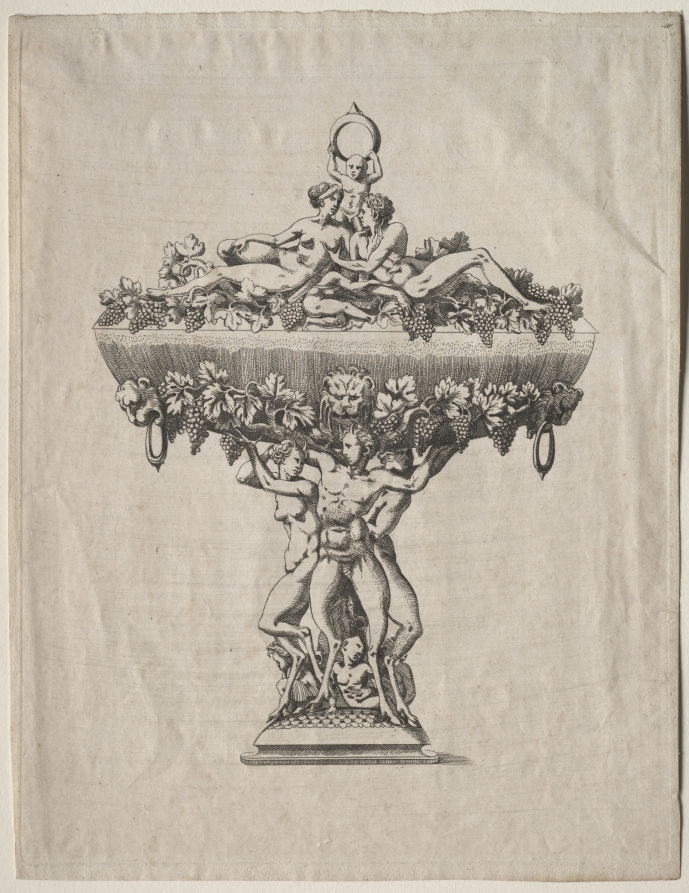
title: Covered Cup with Grape Festoon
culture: France?, 16th century (?)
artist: copy after Antonio Fantuzzi (Italian, c. 1510-c. 1550)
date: mid-1500s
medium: etching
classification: Print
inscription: lower right, in graphite: [sp?]; lower right, in graphite: [illegible]; VERSO, lower left, in graphite: TNK[line above] / L.B. 1447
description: When the French king Francis I (reigned 1515–47) decided to renovate his hunting lodge at Fontainebleau, near Paris, he set the stage for the development of Mannerism in France. In the early 1530s, Francis I successfully lured the Italian artists Rosso Fiorentino (1495–1540) and Francesco Primaticcio (1504/5–1570) to Fontainebleau to participate in its redecoration. The most influential project at Fontainebleau was the long corridor now known as the Gallery of Francis I. Here, Rosso developed an innovative system of wall decoration that combined painting with stucco sculpture in high relief. The type of art that began to flourish under Rosso and Primaticcio in the 1530s is known today as the School of Fontainebleau. The term also refers to a stylistically coherent group of etchings and engravings. Many of these are important records of now lost decorations created at the chateau.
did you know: This print was made with etching, a printmaking technique in which designs are bitten into a metal plate using a corrosive acid.